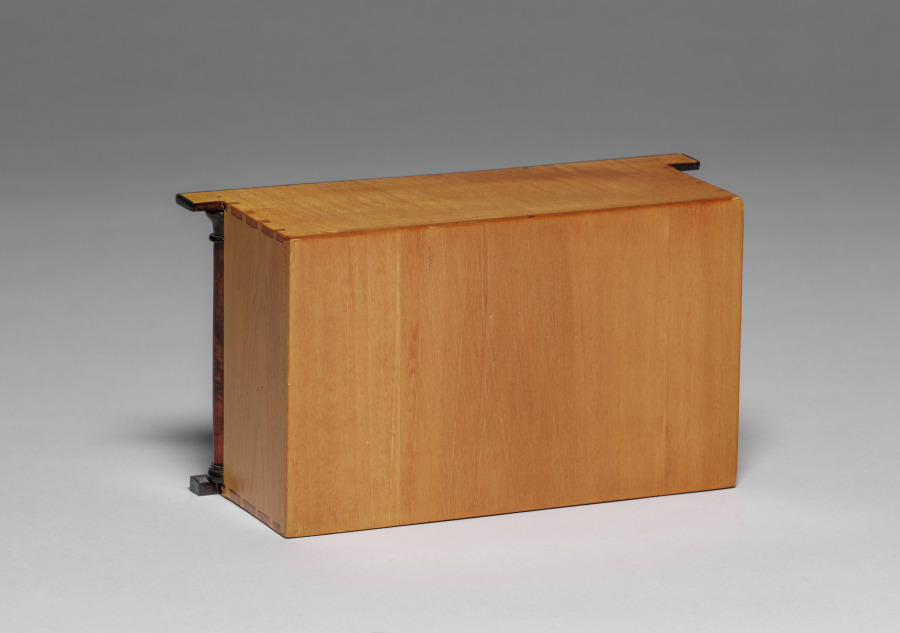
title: Mirrored Partition for a Globe Work Table (Globustisch)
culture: Austria, Vienna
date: c. 1810–15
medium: Burl walnut veneer, mahogany, ebony, satinwood, gilt wood, painted wood; mirrored glass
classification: Furniture and woodwork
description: Work tables resembling globes were the usual form for a lady's sewing or writing table around 1800 in Austria. Combining moving parts, secret compartments, and highly finished decoration, these tables were also a way for the cabinetmaker to show off his skill. The tripod supports and temple-like architectural quality of both the exterior and interior decoration reflect the fashionable taste for neoclassical style, or Biedermeier as it was called in Austria, where Vienna was the center of such elaborate furniture production.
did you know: The top half of the globe rotates upward to reveal hidden compartments for sewing tools, threads, and unfinished fabric pieces.